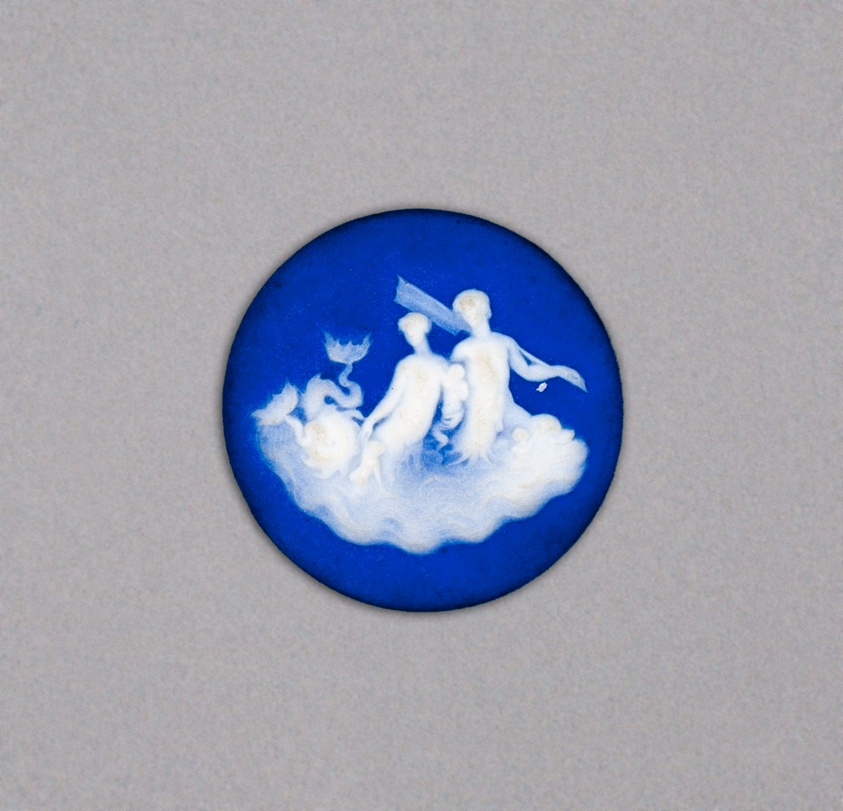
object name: Ceramics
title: Cameo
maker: Wedgwood Manufactory (England, founded 1759)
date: Late 18th century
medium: Stoneware (jasperware)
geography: Burslem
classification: cameo (sculpture); sculpture; stoneware; european decorative arts; ceramics